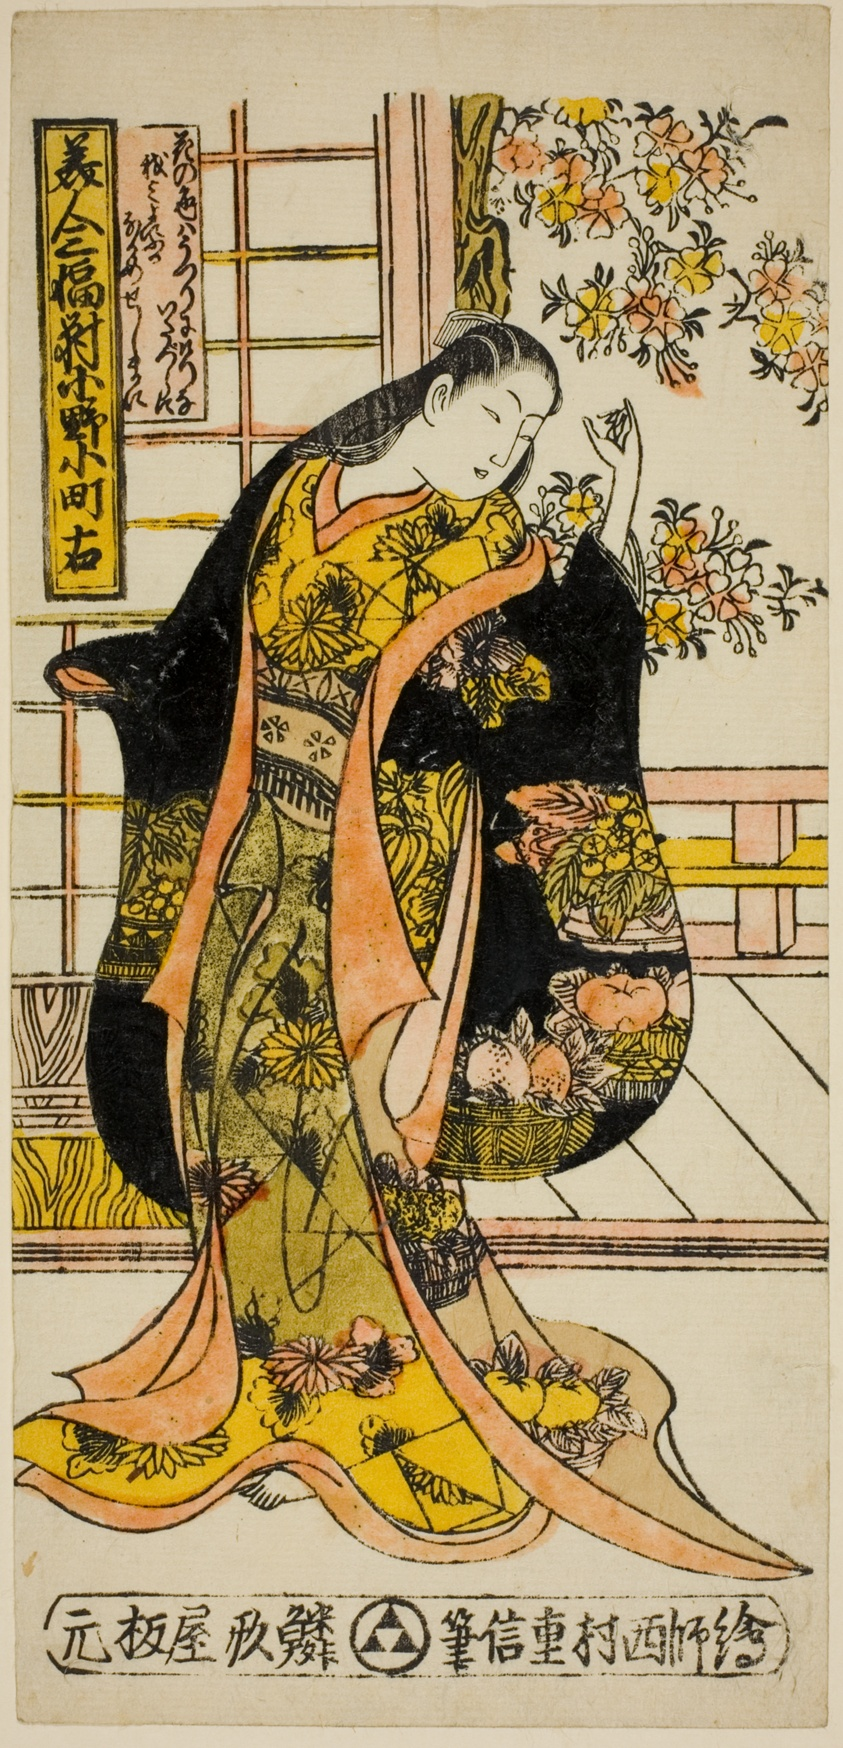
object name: Print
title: Ono no Komachi, from A Set of Three Beauties (Bijin sanpukutsui)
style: Japanese (culture or style)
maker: Nishimura Shigenobu (Japanese, active c. 1723-47)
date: c. 1720s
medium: Hand-colored woodblock print; right sheet of hosoban triptych, urushi-e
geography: Japan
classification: woodblock print; print; asian art